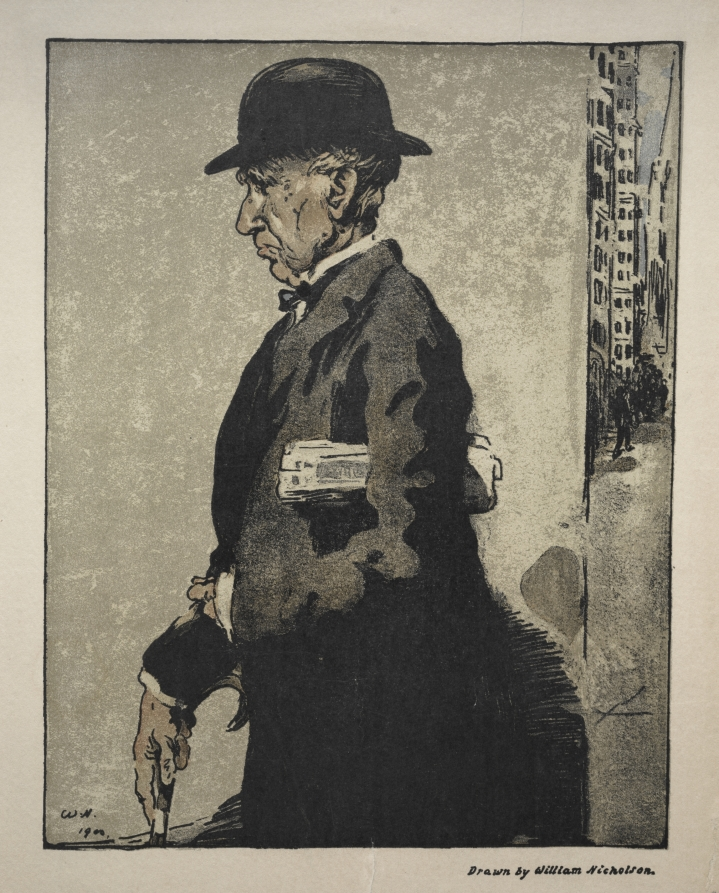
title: Russell Sage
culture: England, 20th century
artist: William Nicholson (British, 1872–1949)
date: 1900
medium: woodcut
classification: Print